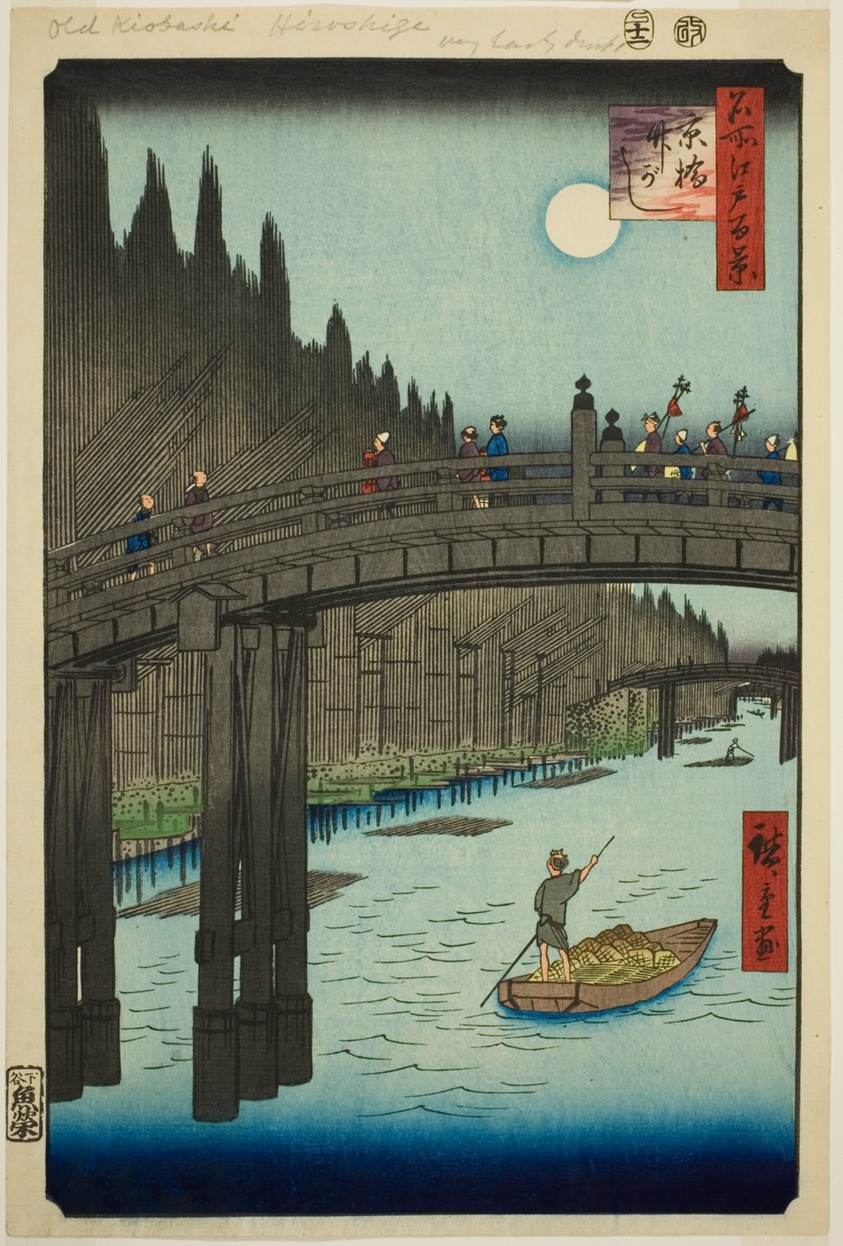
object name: Print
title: Bamboo Yards and Kyo Bridge (Kyobashi Takegashi), from the series "One Hundred Famous Views of Edo (Meisho Edo hyakkei)"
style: Japanese (culture or style)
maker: Utagawa Hiroshige 歌川 広重; Japanese, 1797-1858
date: 1857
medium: Color woodblock print; oban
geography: Japan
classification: print; asian art